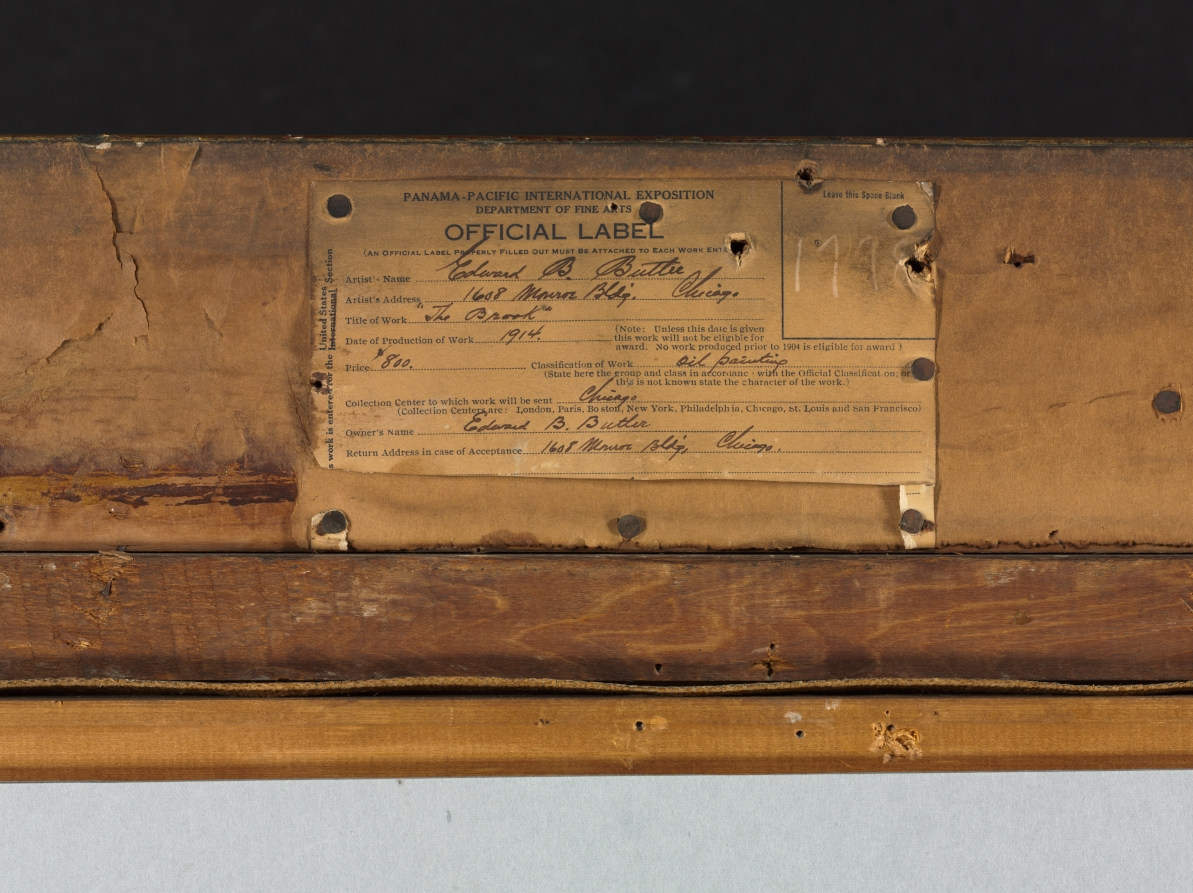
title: Early Spring, California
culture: America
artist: Edward B. Butler (American, 1853–1928)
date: 1918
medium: oil on canvas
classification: Painting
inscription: Signed lower right: Edward B. Butler - -1918